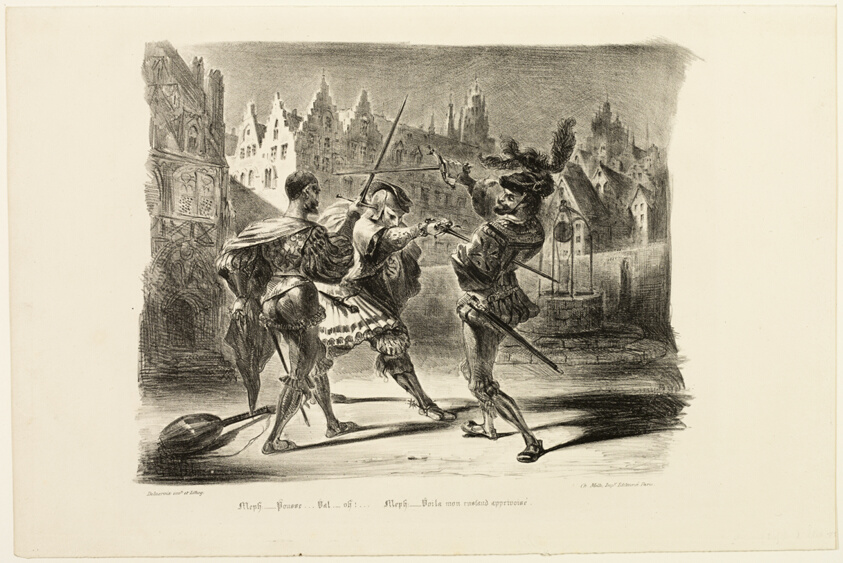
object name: Print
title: The Duel Between Faust and Valentine, from Faust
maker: Eugène Delacroix (French, 1798-1863)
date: 1828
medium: Lithograph in black on ivory wove paper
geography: France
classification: lithograph; print; prints and drawing